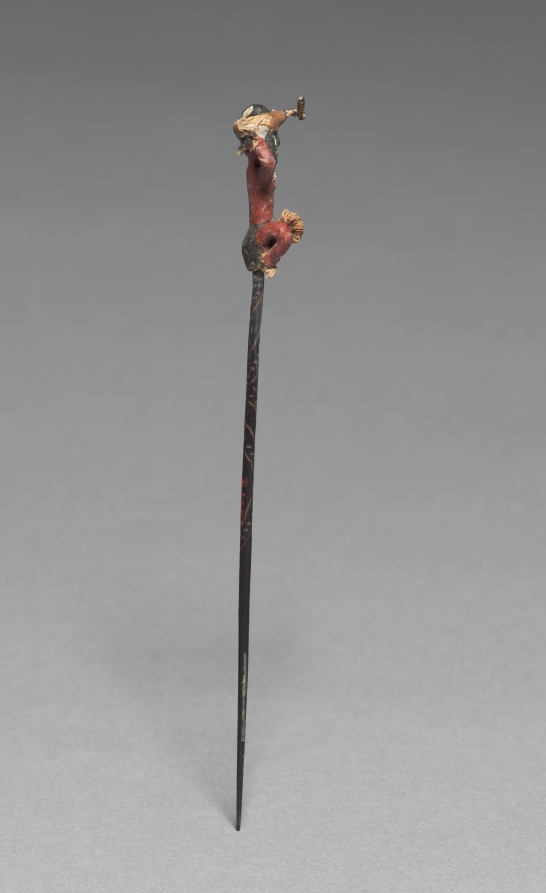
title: Pin with Yarn Figure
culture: Peru, South Coast, Nasca style?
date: c. 300 BCE–200 CE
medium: wood, yarn, paint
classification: Jewelry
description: Paracas headgear from mummy bundles sometimes incorporate human-hair wigs, wound with long headbands and slings. Ornamented with a diminutive kneeling figure, this pin may have been used like a hat pin to hold the wrappings in place. Although poorly preserved, this object illustrates the use of resin pigment on materials other than ceramics.